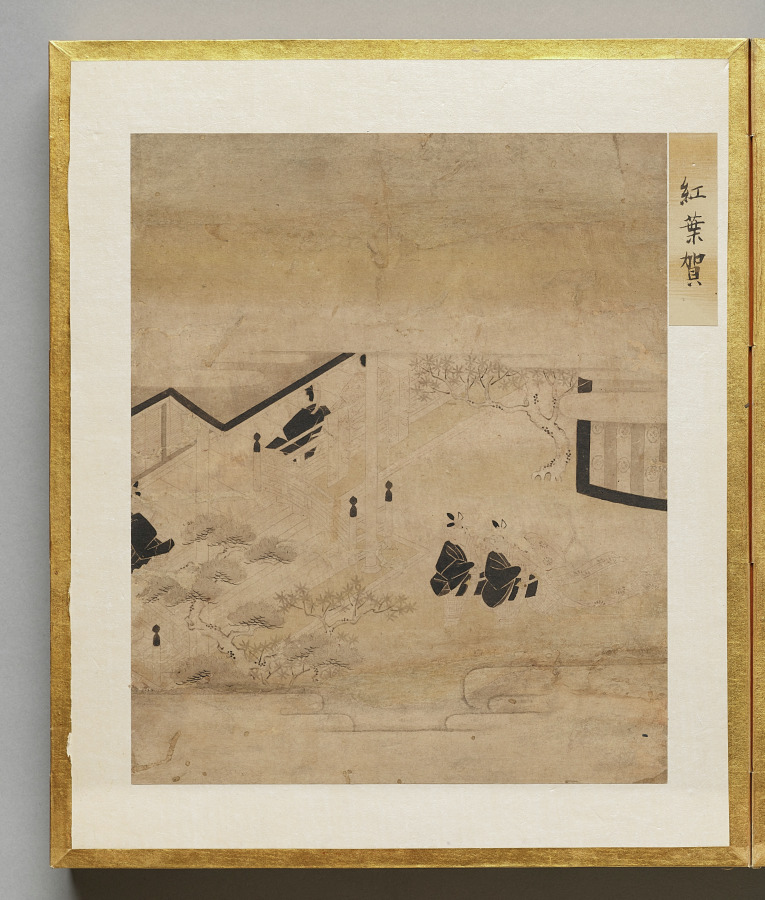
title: Autumn Excursion from Album of Illustrations for the Tale of Genji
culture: Japan, Edo period (1615–1868)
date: 1600s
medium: painting in an accordion-style album; ink, light color, and gold on paper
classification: Bound Volume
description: This album contains illustrations for the classic literary work the Tale of Genji, authored in the 1000s by Murasaki Shikibu, an aristocrat of the Heian period (794–1185) court. The scenes are painted in the “white drawing” (hakubyō) mode, in which a fine ink line is used to depict figures and spaces with great subtlety, punctuated only occasionally by traces of red pigment for a character’s lips, a detail of a garment, or a decorative element. These two scenes illustrate episodes from the chapters “Thin Veil of Cloud” (Usugumo) and “Barrier Gate” (Sekiya).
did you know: The illustrations are identified by chapter title in cartouches to the upper right of the paintings.